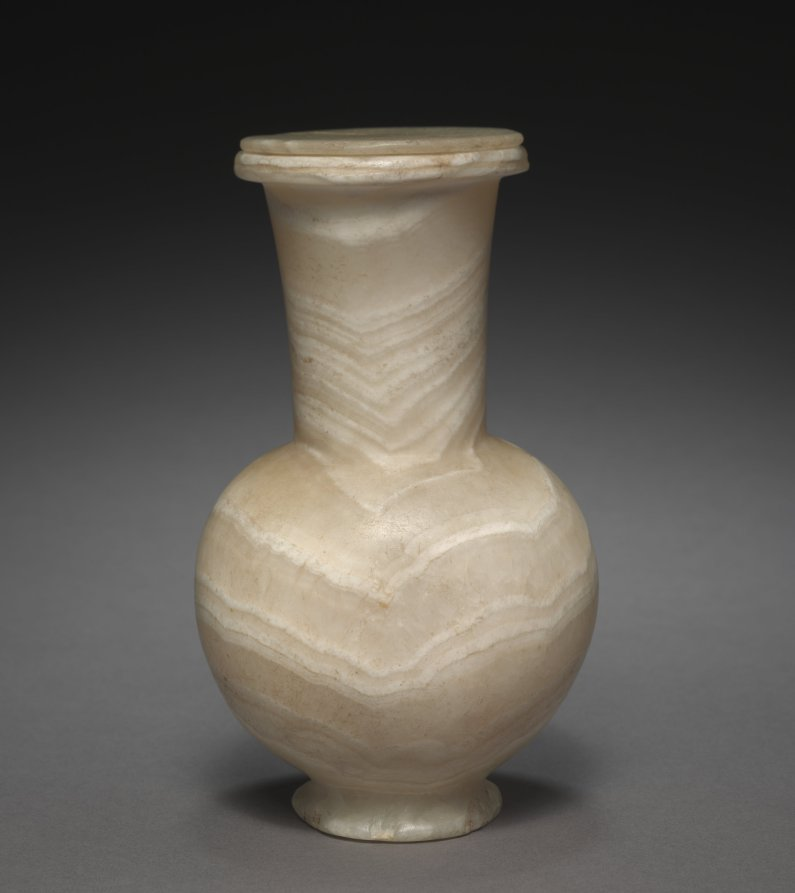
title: Long-Necked Flask with Lid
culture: Egypt, New Kingdom (1540–1069 BCE), Dynasty 18, reign of Tuthmosis III (1479–1425 BCE)–reign of Amenhotep III (1390–1352 BCE)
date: 1401–1353 BCE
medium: travertine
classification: Vessels